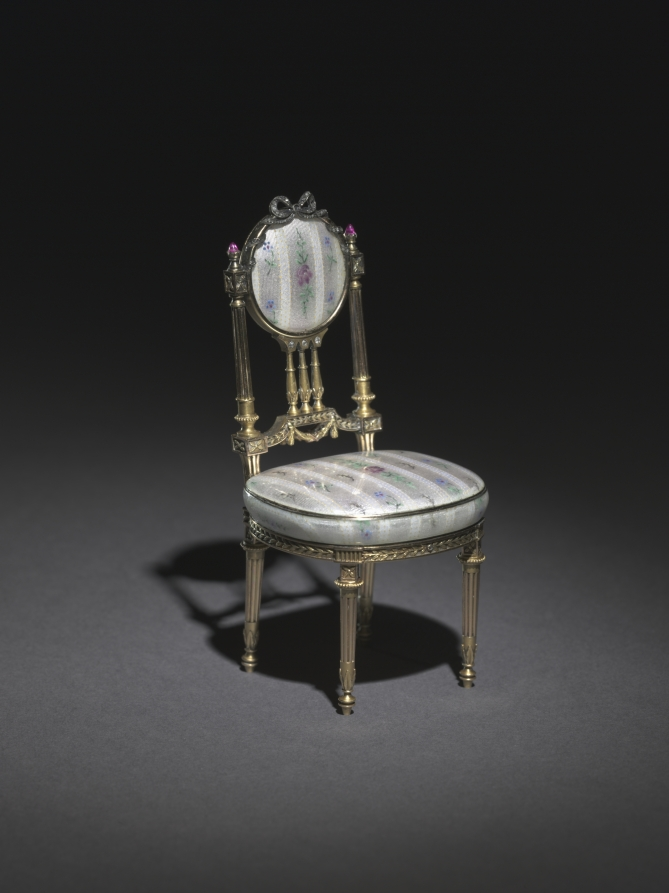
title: Miniature Chair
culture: Russia, St. Petersburg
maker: House of Fabergé (Russian, 1842–1918)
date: 1896–1906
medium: gold, silver gilt, enamel, rubies, diamonds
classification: Miscellaneous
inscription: 56, Kokoshnik; tester's initials in Cyrillic; 84, Kokoshnik, tester's initials in Cyrillic; К.ФАБЕРЖЕ [C. Fabergé]; Kokoshnik; double-headed eagle; К.Ф. [C.F.]; 25196 scratched.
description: The giving of small precious objects as intimate gifts between family members within the imperial court was spurred by the House of Fabergé's seemingly endless supply of bejeweled utilitarian objects decorated as expensively as possible, such as this stamp holder disguised as an exquisite miniature chair in the Louis XVI taste of the late 1700s.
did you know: This miniature chair has a clever mechanism that allows the seat cushion to slide forward and upward slightly so that it can be opened to reveal a compartment, probably used to hold stamps on a desk.